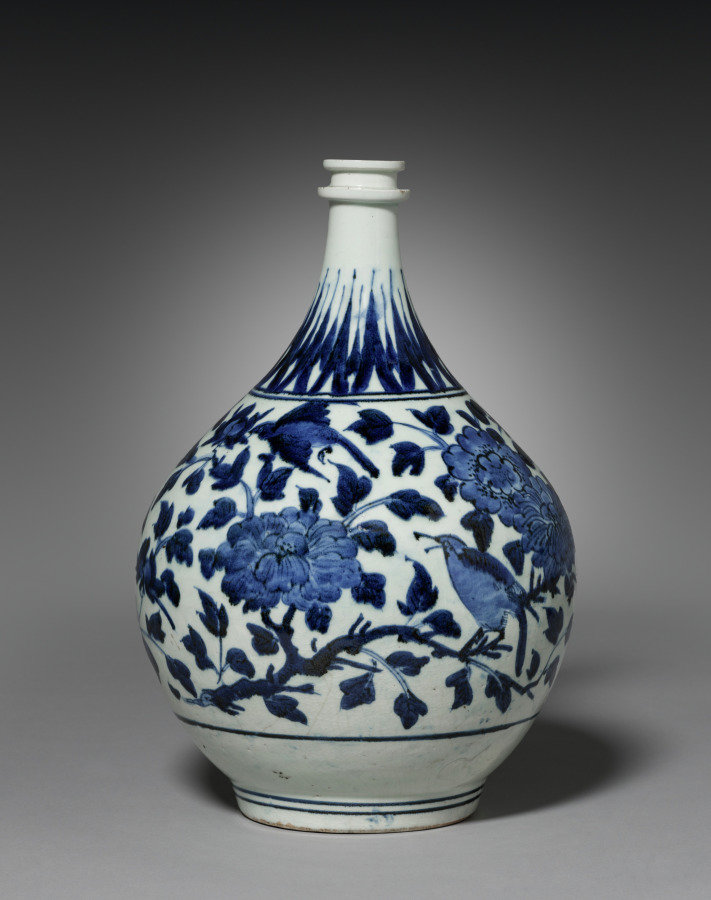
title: Medicine Bottle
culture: Japan, Edo period (1615–1868)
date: 1670s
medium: porcelain with underglaze blue decoration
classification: Ceramic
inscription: "I.C." on bottom (probably made for Joannes Camphuys, 1634–1695).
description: While inspired by medicine jars used in European pharmacies, this bottle was likely decorative. It may have been exported by the Dutch East India Company, a powerful trading company from the Netherlands. In Japan, it operated from Deshima, a man-made island in Nagasaki harbor created in 1636. The initials “I. C.” appear on the base. As the letter J was often transposed with the letter I in Europe of the 1600s, some scholars believe the bottle may have been made for Johannes Camphuys (1634–1695), who was in charge of the Dutch East India Company’s operations in Deshima in 1671.